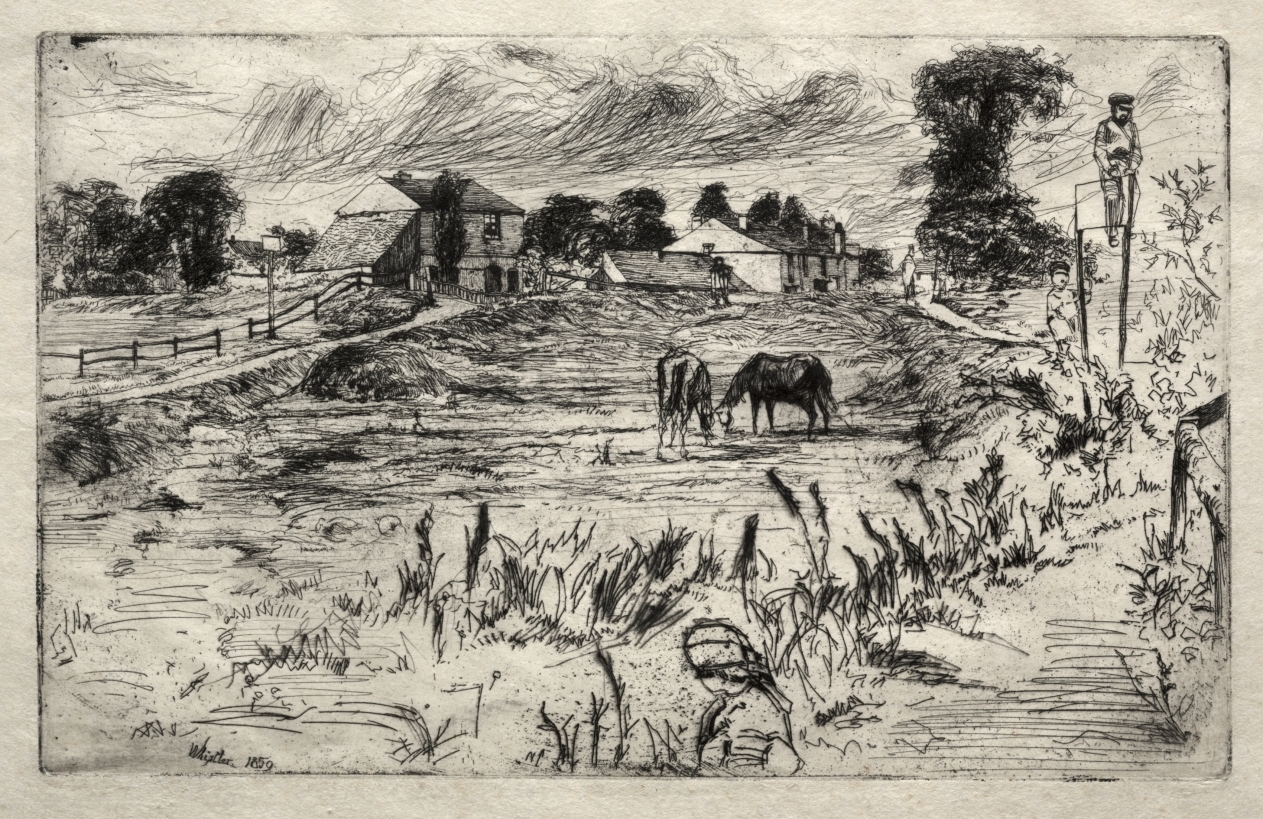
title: Landscape with the Horse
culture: America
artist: James McNeill Whistler (American, 1834–1903)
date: 1859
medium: etching and drypoint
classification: Print